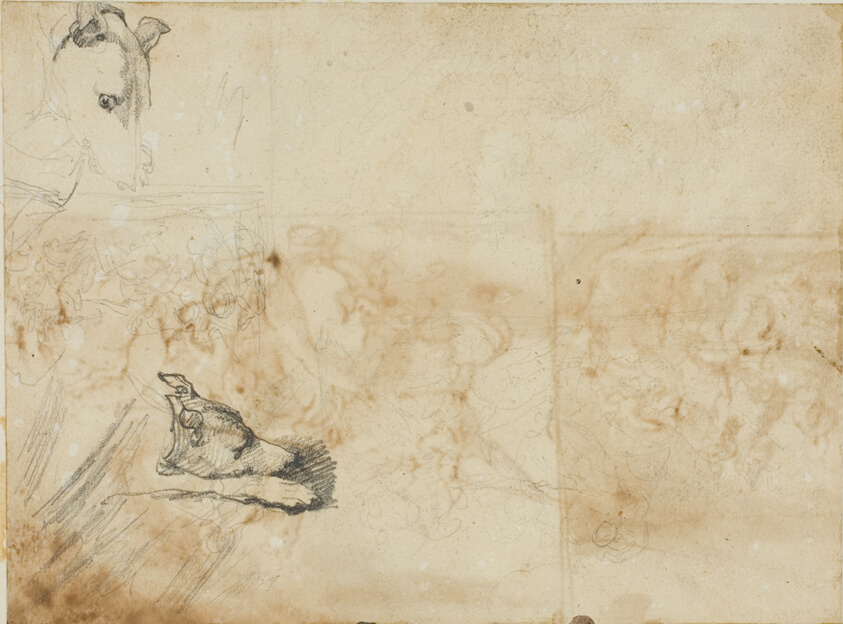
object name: Drawing and Watercolor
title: Sketches of an Equestrian Battle and the Head of a Greyhound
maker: Jean Louis André Théodore Géricault (French, 1791-1824)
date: 1813/14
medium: Graphite on cream wove paper, perimeter mounted on ivory laid paper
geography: France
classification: drawings (visual works); prints and drawing